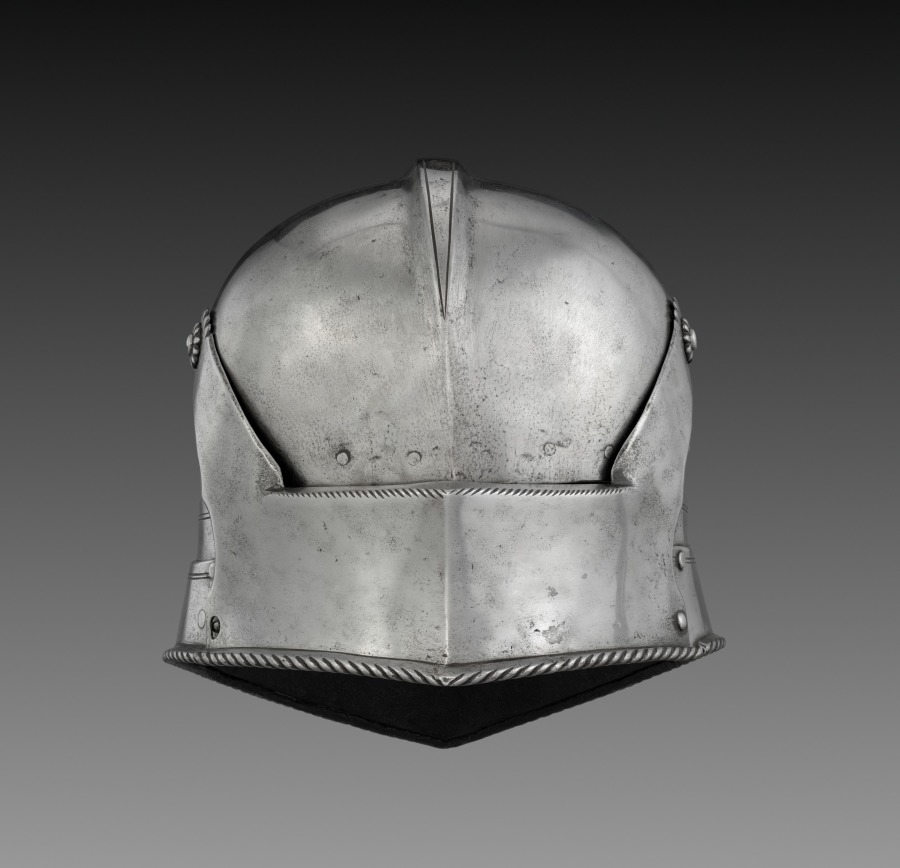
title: Visored Sallet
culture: Germany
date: c. 1490–1500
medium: steel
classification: Arms and Armor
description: The sallet is a partly open-face helmet common in Europe during the 1400s, used in both equestrian and infantry versions. Sallets with movable visors, like this example, are considered to be more technically and visually interesting; beautifully streamlined, it assumes a highly sculptural teardrop shape. Originally it would have been part of a complete suit of armor. The sallet became the quintessential helmet form of the late Middle Ages and is frequently represented in medieval miniatures and woodcuts.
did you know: Medieval sallets were design inspiration for modern-day fireman's helmets.